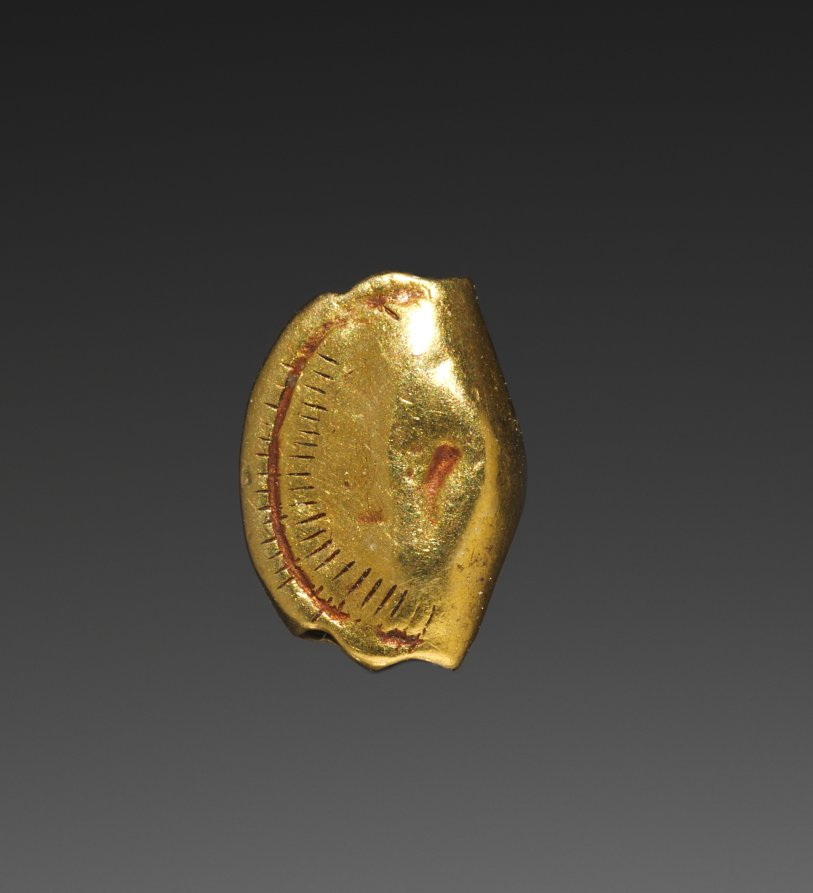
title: Wallet Bead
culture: Egypt, New Kingdom (1540–1069 BCE), Dynasty 18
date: 1540–1296 BCE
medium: gold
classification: Jewelry